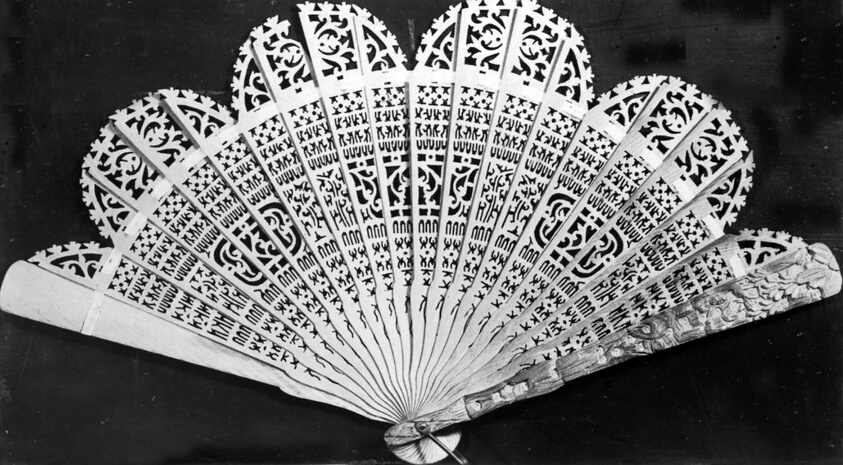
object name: Costume and Accessories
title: Fan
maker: India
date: 19th century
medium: Carved sandal wood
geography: India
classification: textile; fan - misc; costume accessory - folding fan; costume accessory; costume